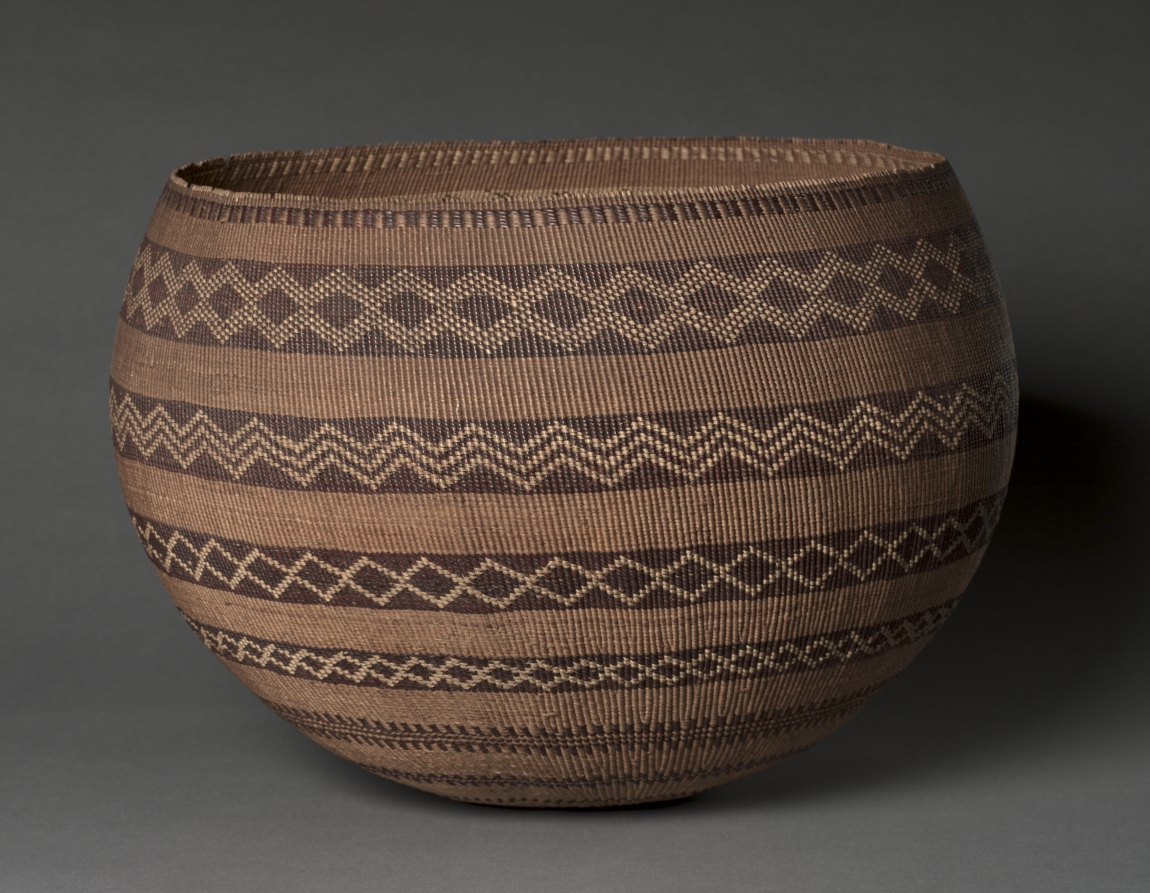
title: Storage Bowl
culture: California, Pomo, late 19th century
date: late 1800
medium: twined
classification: Basketry